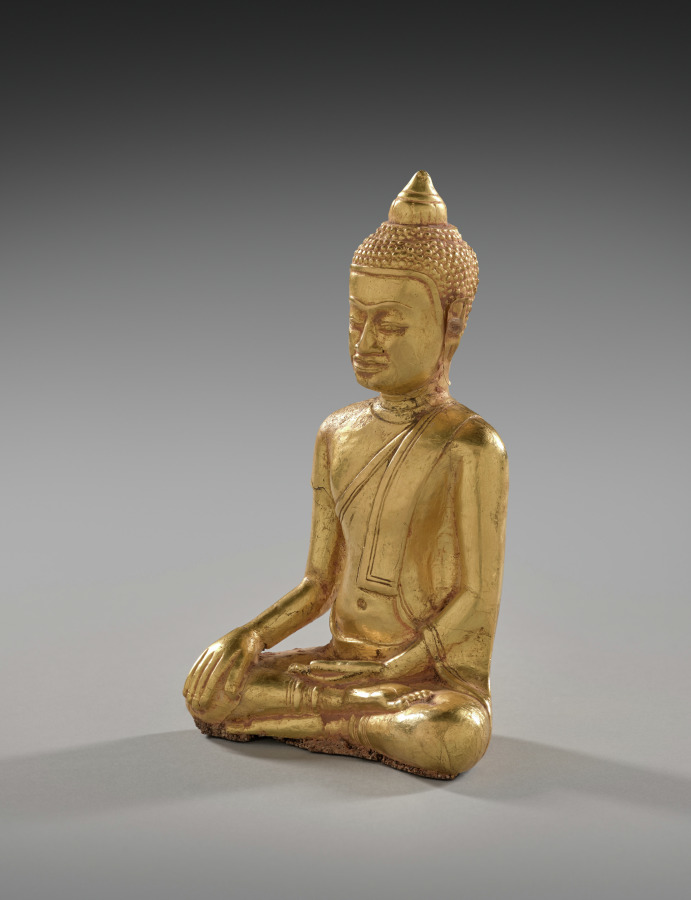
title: Seated Buddha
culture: Thailand, Ayutthaya, Wat Ratchaburana, 14th century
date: before 1424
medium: gold with resin core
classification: Sculpture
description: This pristinely modeled Buddha was fashioned from a sheet of 24-karat gold, using the repoussé (hammering) technique. The figure is filled inside with a resin core. The style is typical of the last phase of Khmer art (800s–1400s), the Lapburi style, which combines characteristics of both Cambodian and Thai sculptural styles.